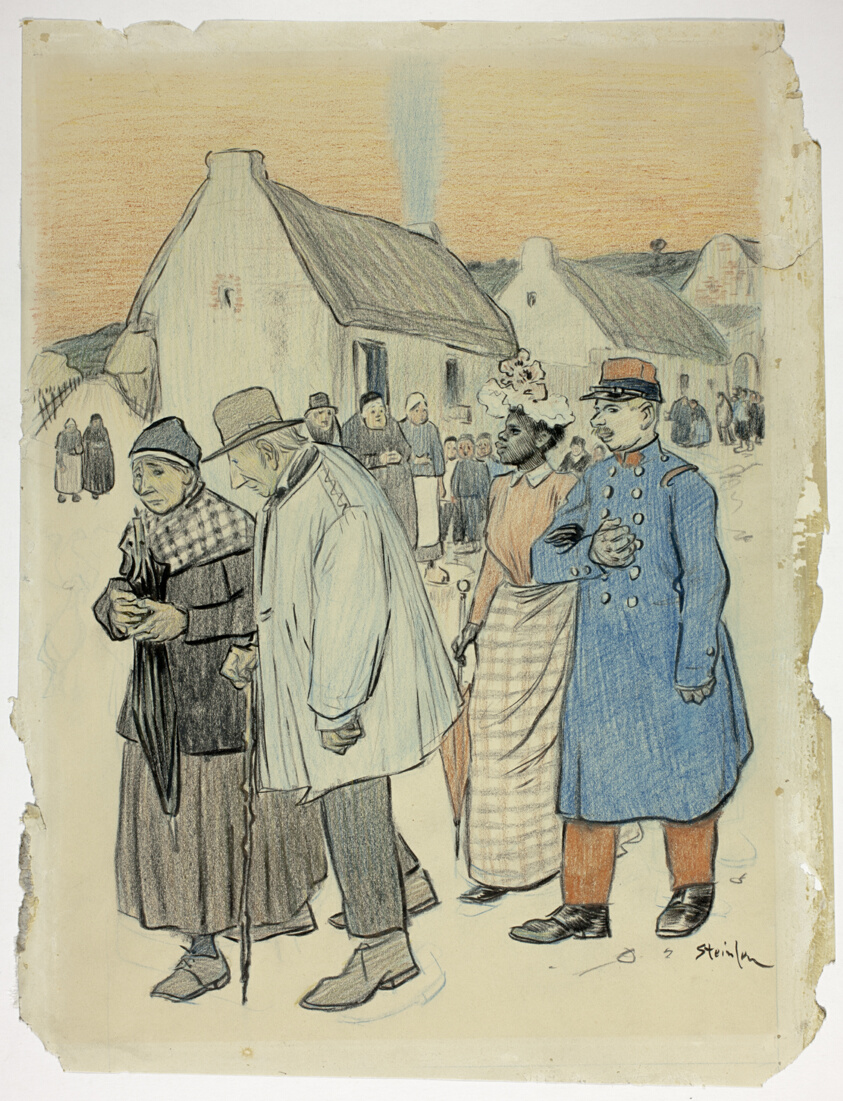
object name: Print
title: Street Scene with Two Couples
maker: Théophile-Alexandre Steinlen; French, born Switzerland, 1859-1923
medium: Colored crayon on paper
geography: France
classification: print; prints and drawing